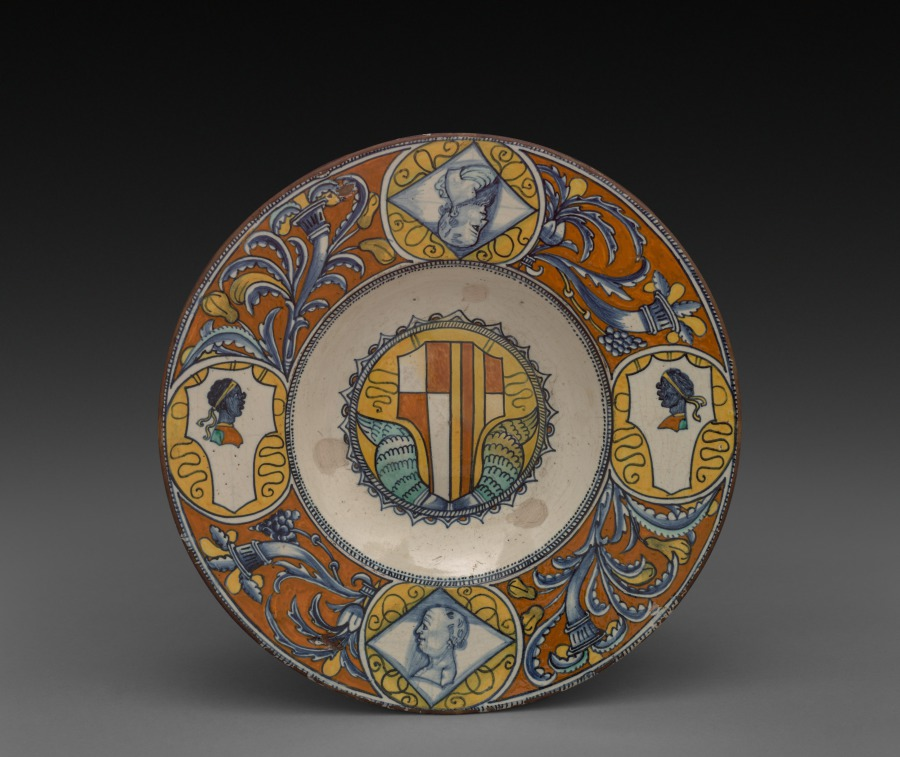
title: Plate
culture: Italy, 16th century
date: 1500s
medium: tin-glazed earthenware (maiolica)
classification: Ceramic